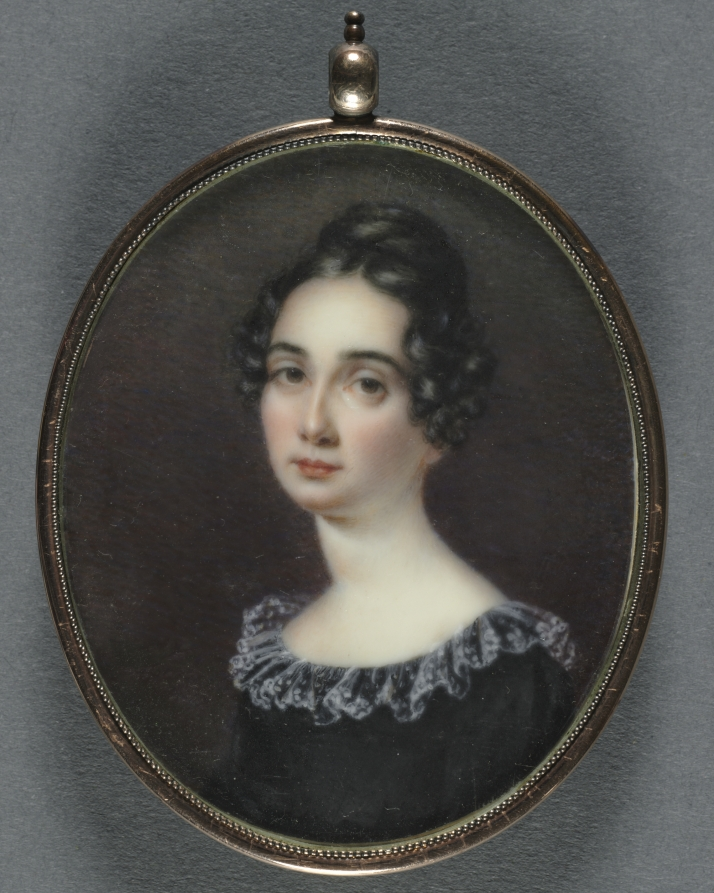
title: Portrait of a Woman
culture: America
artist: Anna Claypoole Peale (American, 1791–1878)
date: 1820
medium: watercolor on ivory on a gilt metal locket with red leather case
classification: Portrait Miniature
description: As a child, Anna Claypoole Peale observed her father James Peale painting miniature portraits and practiced alongside him. She eventually rivaled his success and became one of the leading portrait miniaturists in American during the 1800s. The sitter’s identity is unknown, but her likeness has been skillfully rendered to emphasize her rosy cheeks, pale skin, and red lips. This object was likely gifted as a sentimental memento to a loved one.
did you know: A compartment on the back of this painting may have originally contained a lock of the sitter’s hair.